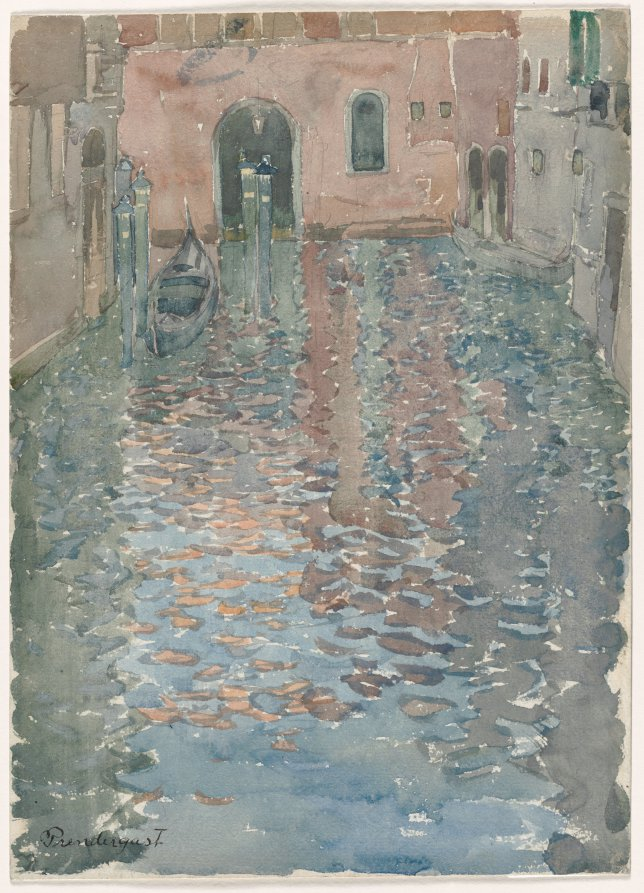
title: Venetian Canals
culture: America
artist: Maurice Prendergast (American, born Newfoundland [now Canada], 1858–1924)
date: c. 1898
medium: watercolor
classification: Drawing